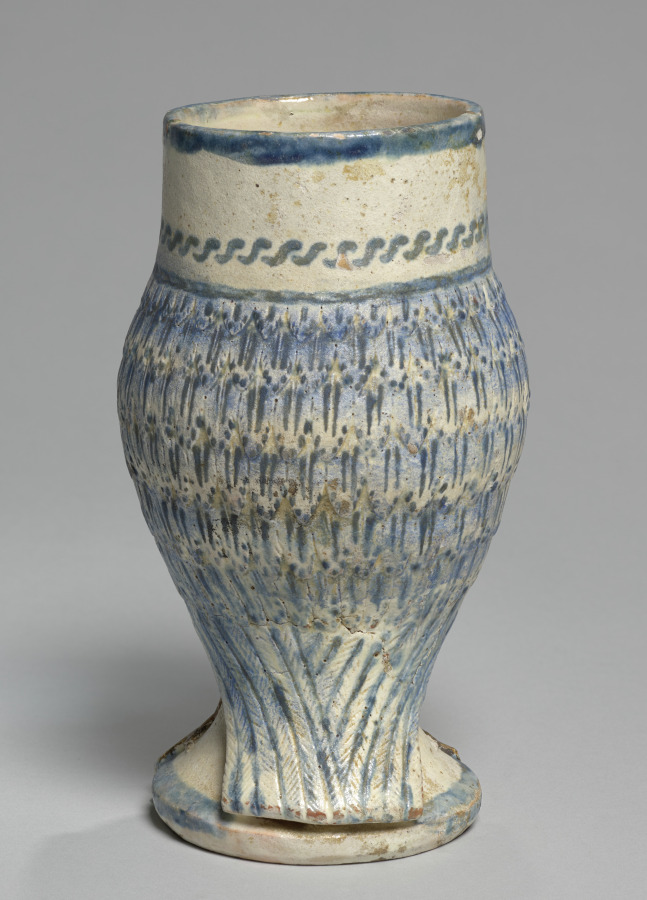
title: Owl (body)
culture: Southern Germany, 16th century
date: 1540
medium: faience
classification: Ceramic